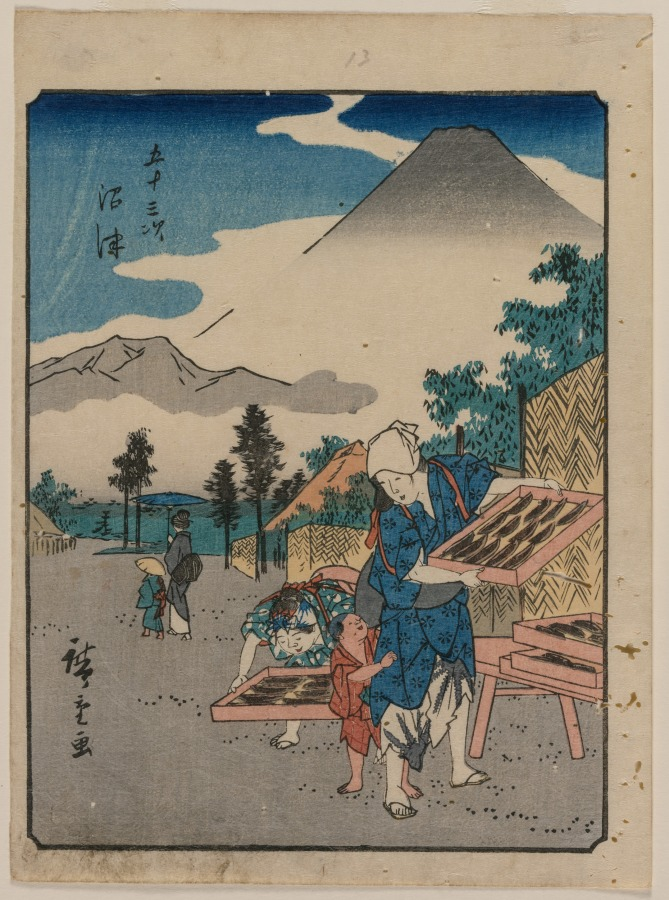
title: The Fifty-Three Stations of the Tokaido: Numazu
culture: Japan, Edo period (1615–1868)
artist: Utagawa Hiroshige (Japanese, 1797–1858)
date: c. 1850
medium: color woodblock print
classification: Print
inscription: Publisher: Muraichi